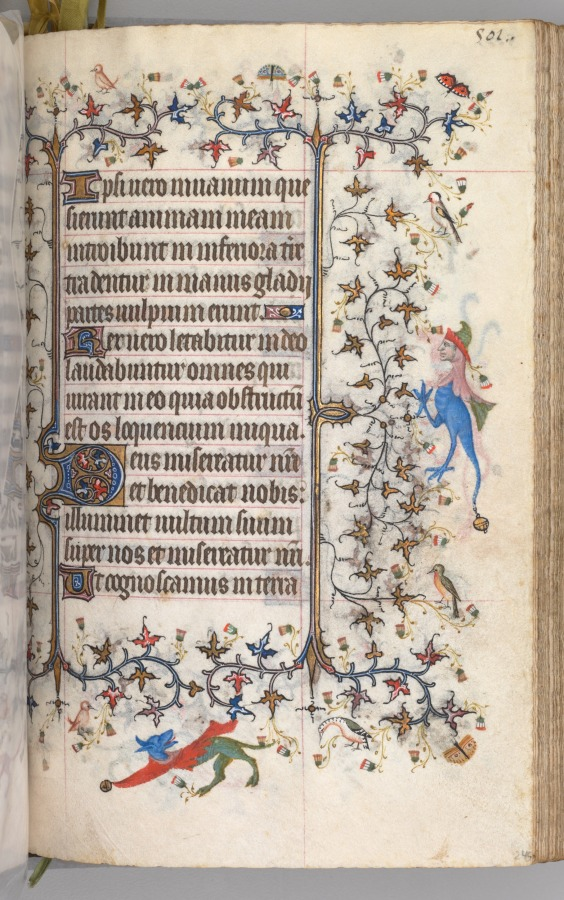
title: Hours of Charles the Noble, King of Navarre (1361-1425): fol. 245r, Text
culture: France, Paris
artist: Master of the Brussels Initials and Associates (French)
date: c. 1405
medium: ink, tempera, and gold on vellum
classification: Bound Volume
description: This precious volume was obviously highly prized by its owner, the French-born King of Navarre, who had his coat of arms painted on no less than twenty folios. Rather than directly commissioning this manuscript from a specific workshop, it seems that Charles the Noble acquired his book of hours -- perhaps ready-made for the luxury market -- while on a trip to Paris in 1404-05. A collaborative effort, six painting styles are evidenced within the pages of this codex, those of two Italians, two Frenchmen, and two Netherlanders. The painter who was responsible for the planning and decoration of the book, and who produced seventeen of the large miniatures, was a Bolognese artist known as the Master of the Brussels Initials. His principal assistant, responsible for most of the borders, was a Florentine who signed his name "Zecho" da Firenze on folio 208 verso.